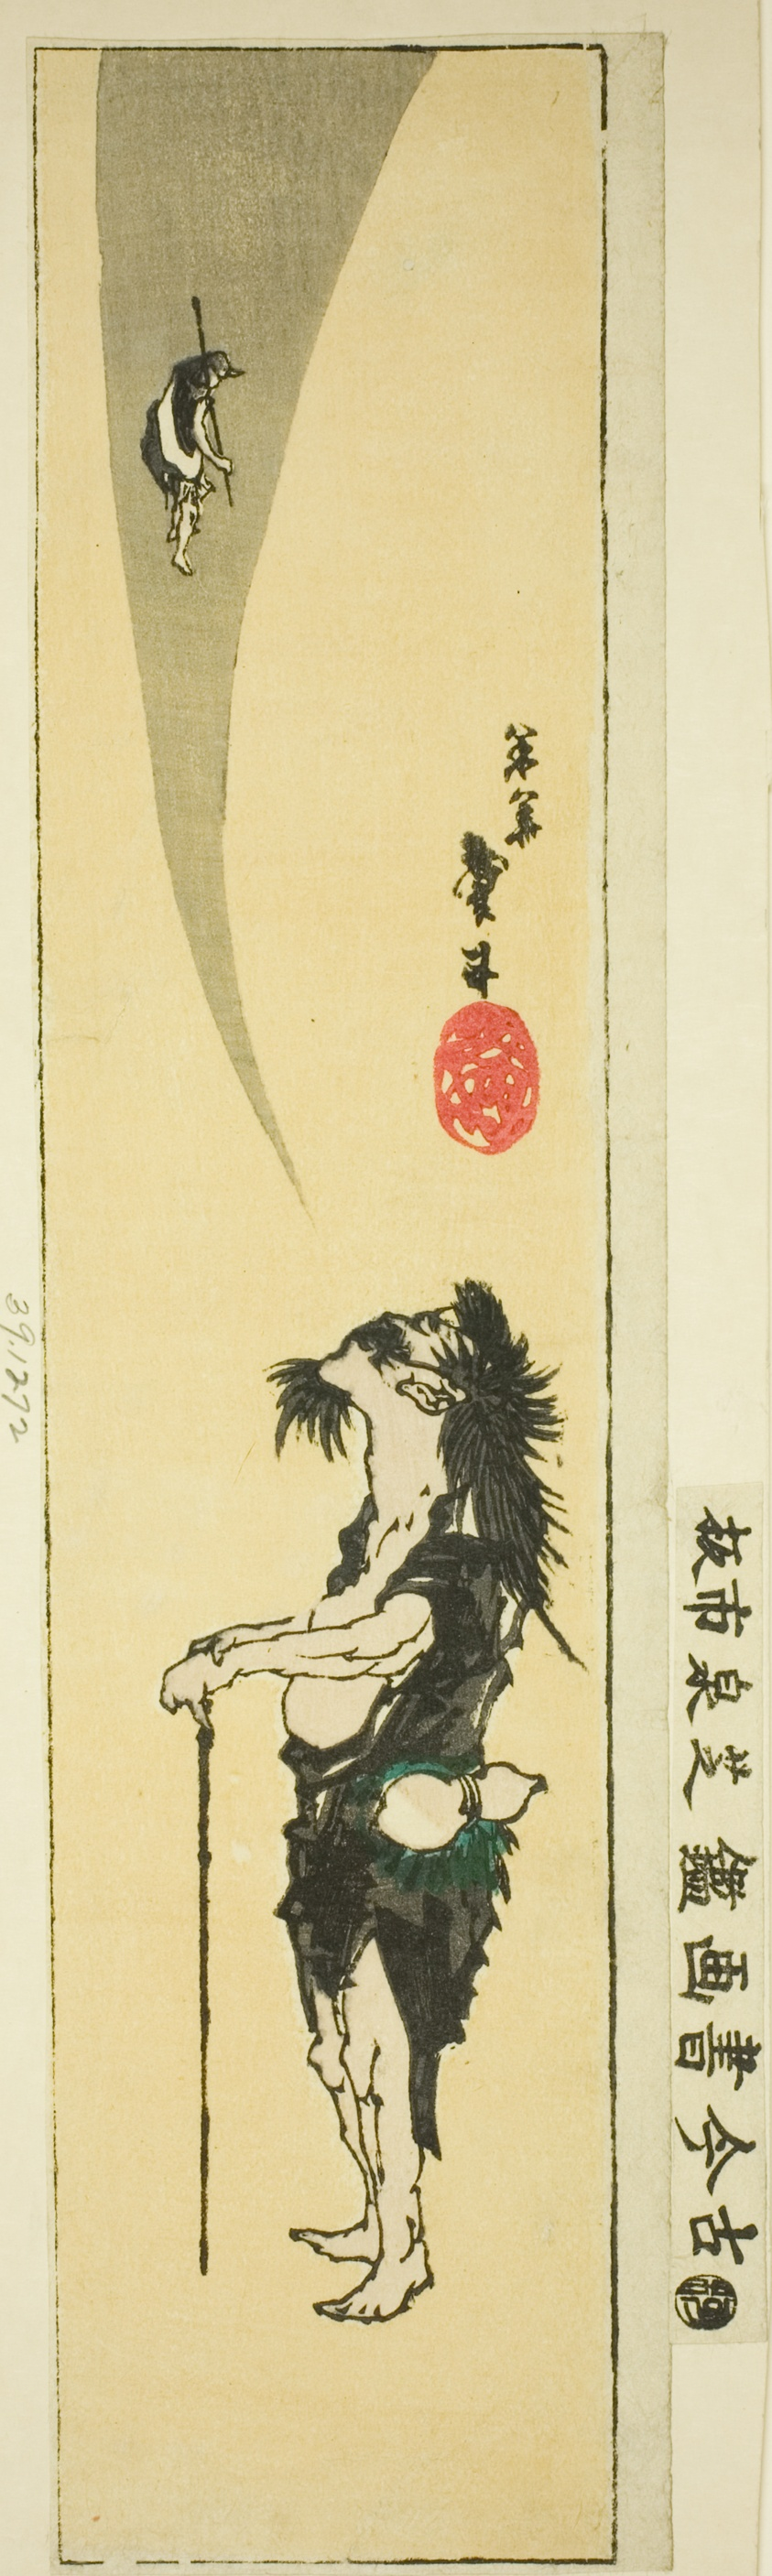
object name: Print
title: Daoist immortal Li Tieguai (Japanese: Tekkai)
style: Japanese (culture or style)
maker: Katsushika Taito II (Japanese, active c. 1810–53)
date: c. 1830/44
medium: Color woodblock print; section of harimaze sheet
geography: Japan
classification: woodblock print; print; asian art